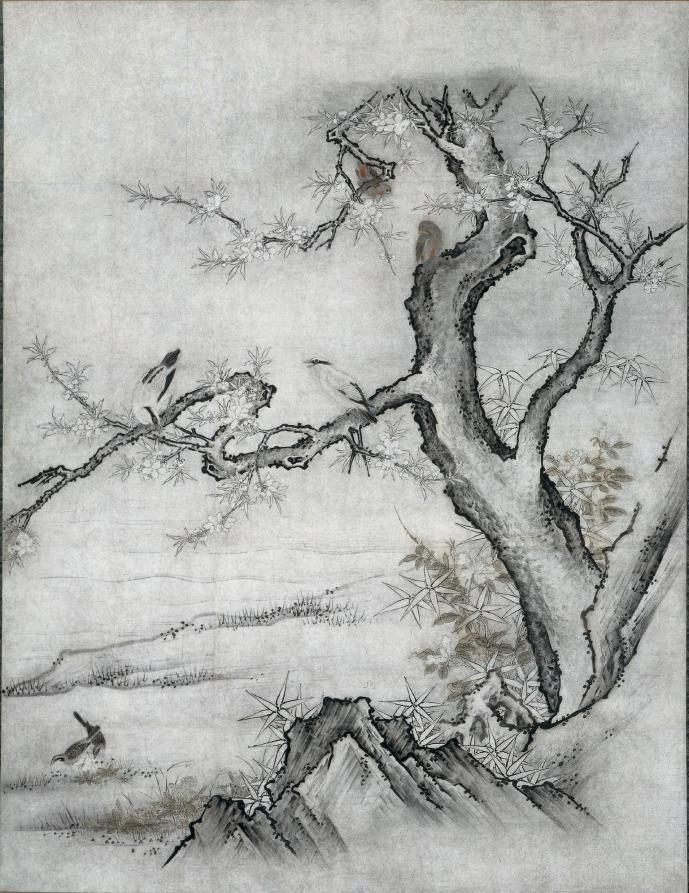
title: Flowers and Birds in a Spring Landscape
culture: Japan, Muromachi period (1392–1573)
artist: attributed to Kano Motonobu (Japanese, c. 1476–1559)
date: 1500s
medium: One of a set of sliding door panels mounted as hanging scrolls; ink and color on paper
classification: Painting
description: These four paintings originally decorated sliding doors that partitioned the interiors of Japanese buildings. Painters from the Kano school, named after the artist Kano Motonobu (1476–1559), were major forces in the production of screens and architectural interiors in Kyoto. When he headed the workshop, his work was prized by the upper strata of society. Kano is credited with combining the subtlety of Chinese black ink painting, as seen in the rocks and hills, with the color and realism of Japanese painting, seen in the birds and flowers. Landscape scenes like this were prized by the elite of Kyoto, both for their contemplative aesthetic and their patrons’ refined taste.